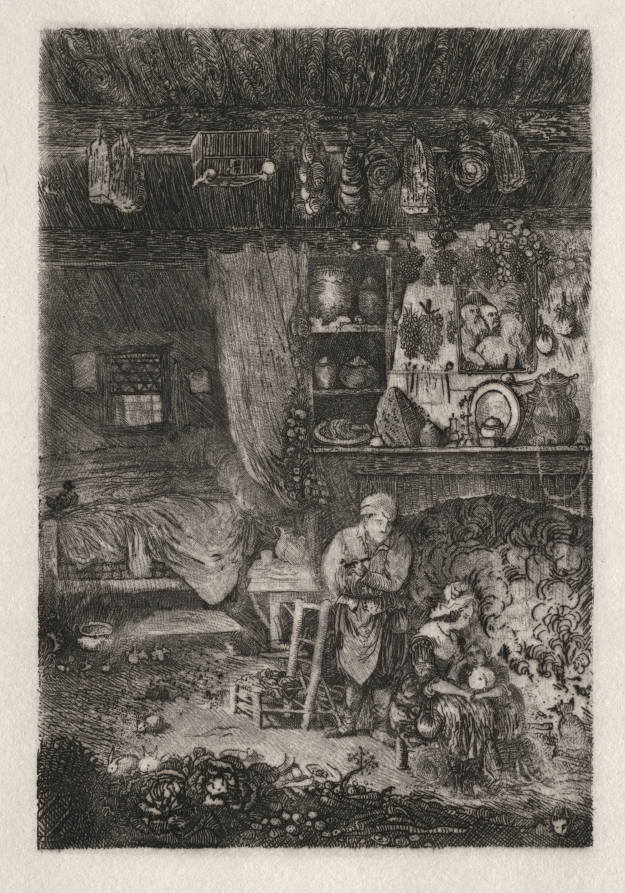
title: Flemish Interior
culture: France, 19th century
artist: Rodolphe Bresdin (French, 1822–1885)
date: 1856–66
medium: etching and roulette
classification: Print